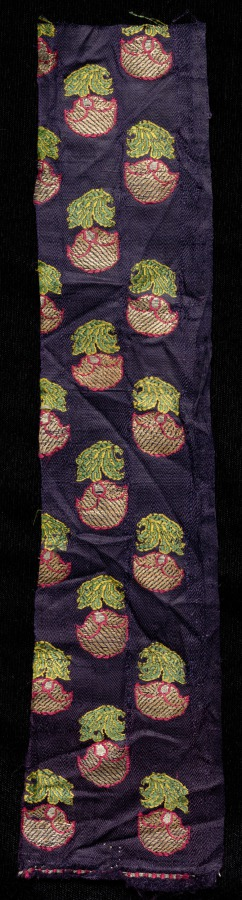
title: Fragment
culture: India, 19th century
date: 1800s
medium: brocade; silk, gold and silver threads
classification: Textile